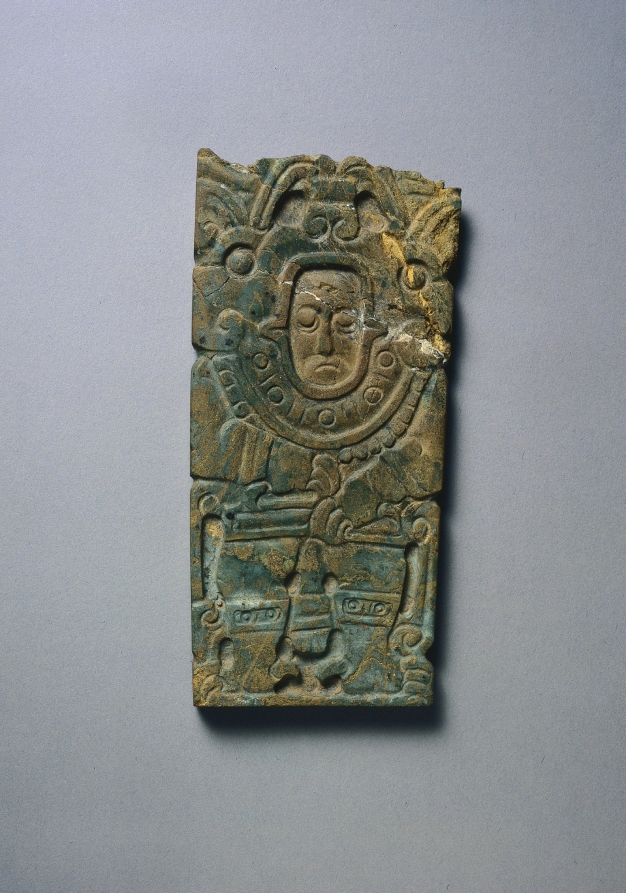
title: Pendant Plaque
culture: Mexico, Oaxaca, Zapotec, 6th-8th Century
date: c. 500–700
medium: jade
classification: Jade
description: This exceptionally large and elaborate plaque depicts a human being costumed as a jaguar, with claws on hands and feet, and a jaguar-head helmet. At the Zapotec capital, Monte Albán, dignitaries in feline garb are portrayed in several relief sculptures. A pendant similar to this one was found in an architectural dedicatory offering deposit at Monte Albán.